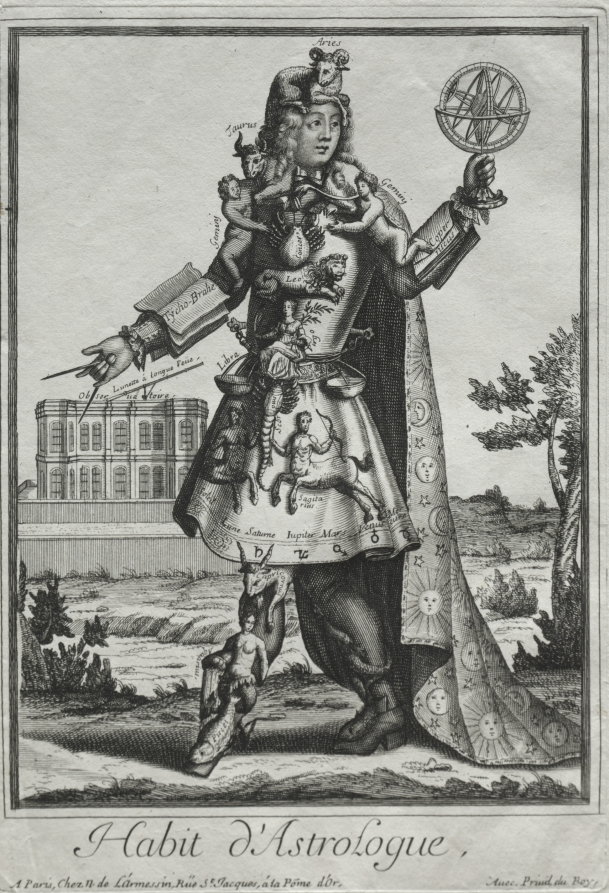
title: Fanciful Costumes: Costume of the Astrologer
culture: France, 17th century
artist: Nicolas de Larmessin II (French, 1638–1694)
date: c. 1690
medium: etching and engraving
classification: Print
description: These two prints are from a series of about 70 fanciful portrayals of various trades and skills. The astrologer is decorated with the twelve astrological signs arranged in order, while the helmet of the fireworks maker appears to spray its own tuft of pyrotechnics into the sky. The astrologer also stands before a building labeled as an observatory, a telescope on its roof, and the costume of the fireworks maker resembles protective armor.